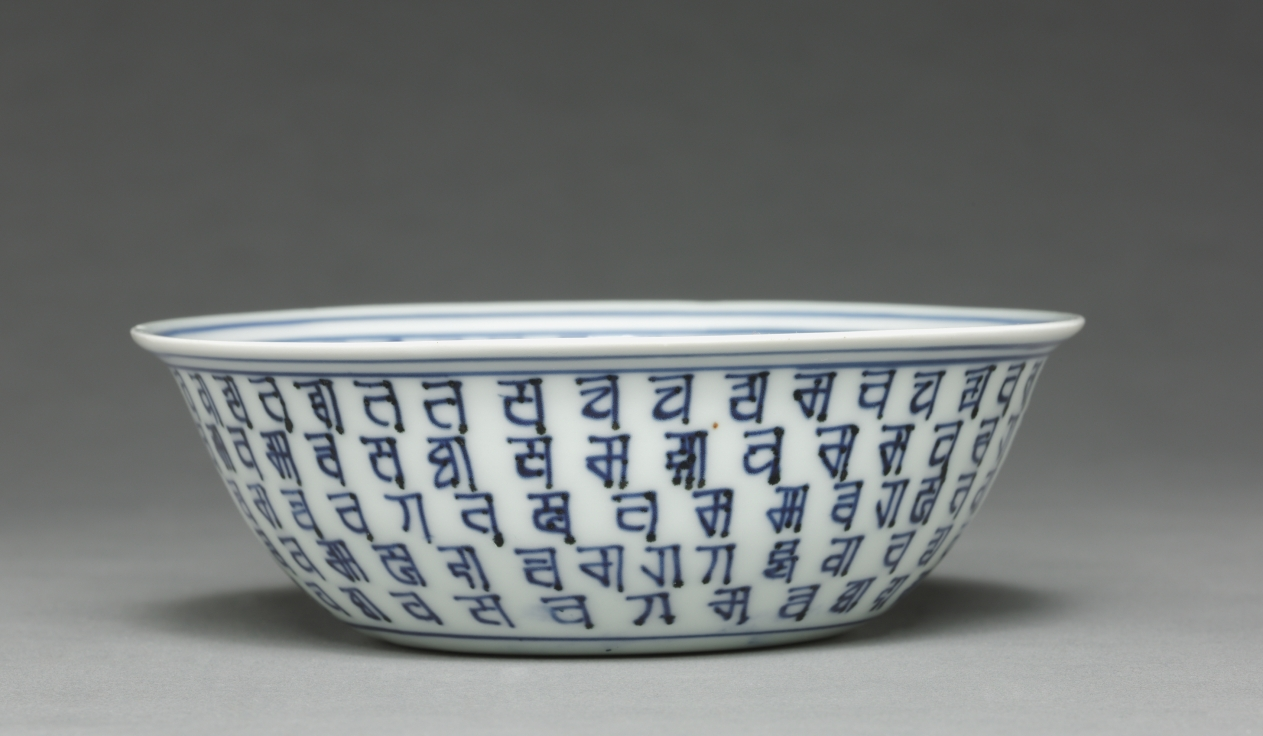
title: Bowl with Bands of Tibetan (Lança) Characters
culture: China, Jiangxi province, Jingdezhen kilns, Ming dynasty (1368-1644), Wanli mark and reign (1573-1619)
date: 1572–1620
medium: porcelain with underglaze blue decoration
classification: Ceramic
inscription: 大明萬曆年製